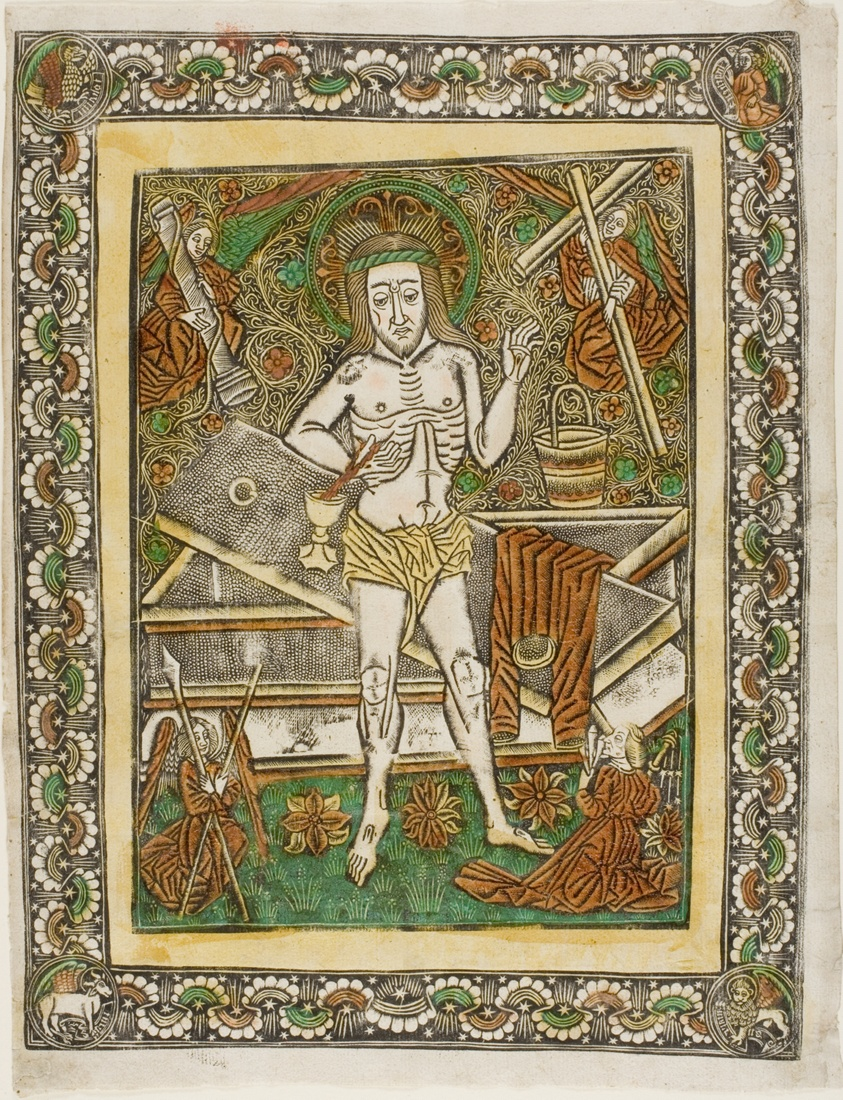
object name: Print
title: The Man of Sorrows with Four Angels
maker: Artist unknown; German, 15th century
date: c. 1470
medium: Metalcut from two plates in black and hand-colored on ivory laid paper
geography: Germany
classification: relief etching; print; prints and drawing